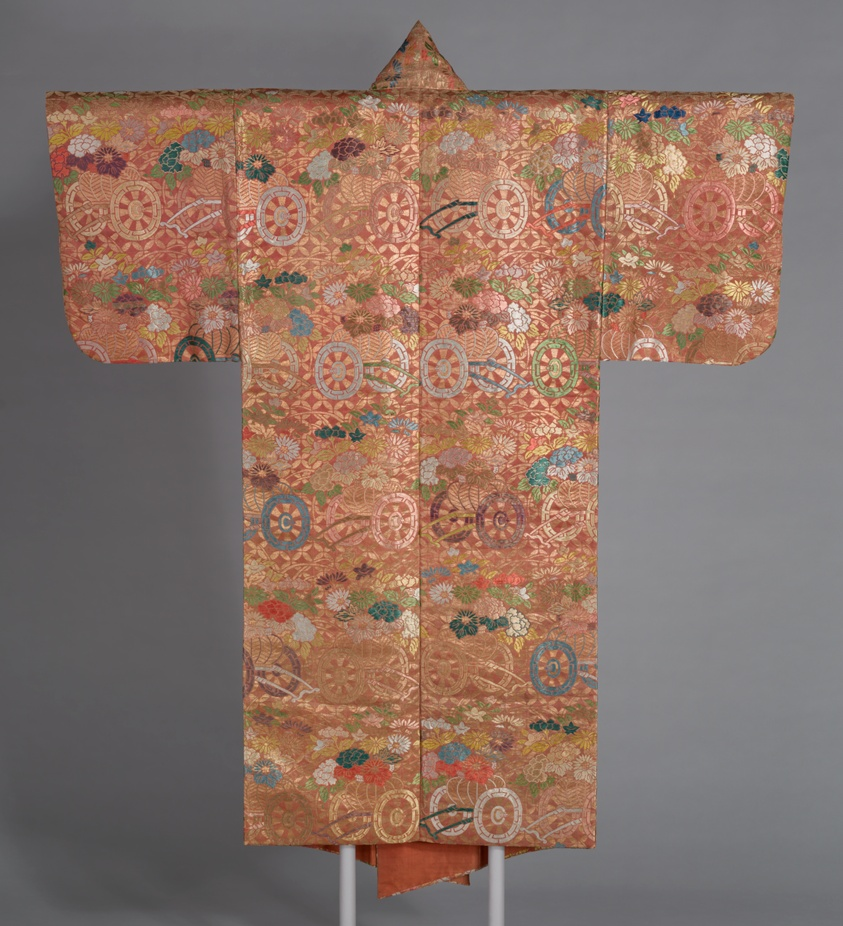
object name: Costume and Accessories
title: Atsuita karaori (Noh Costume)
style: late edo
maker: Japan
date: late Edo period (1789–1868), 1801/25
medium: Silk and gold-leaf-over-lacquered-paper strips, warp-float faced 2:1 'Z' twill weave with supplementary patterning wefts; lined with silk, plain weave; dyed with safflower, beni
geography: Japan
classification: textile; costume - weaving; costume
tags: flowers, floral motifs